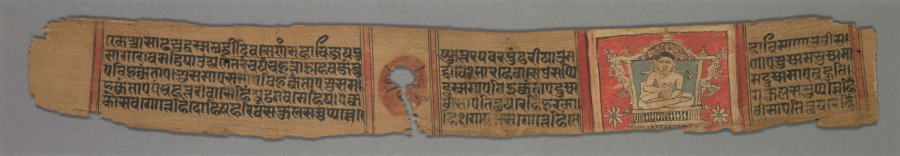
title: The Monk Gautama, Enthroned: Folio 2 (recto), from a Kalpa-sutra and Story of Kalakacharya of Devachandra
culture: Western India, Gujarat, Patan (Anahillapura), reign of King Sarangadeva of the Vaghela dynasty (1275-1297)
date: 1279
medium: gum tempera and ink on palm leaf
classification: Painting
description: The text on this rare, early manuscript page tells of the birth of Mahavira, but the painting is that of a monk, seated in the yogic posture of meditation and making the gesture of recitation and discourse with his right hand. He wears a white robe, and over his shoulders is a broom that he would use to sweep the ground before him as he walks, to ensure he does not inadvertently harm a tiny creature. Strict adherence to nonviolence is a major tenet of the Jain religion.